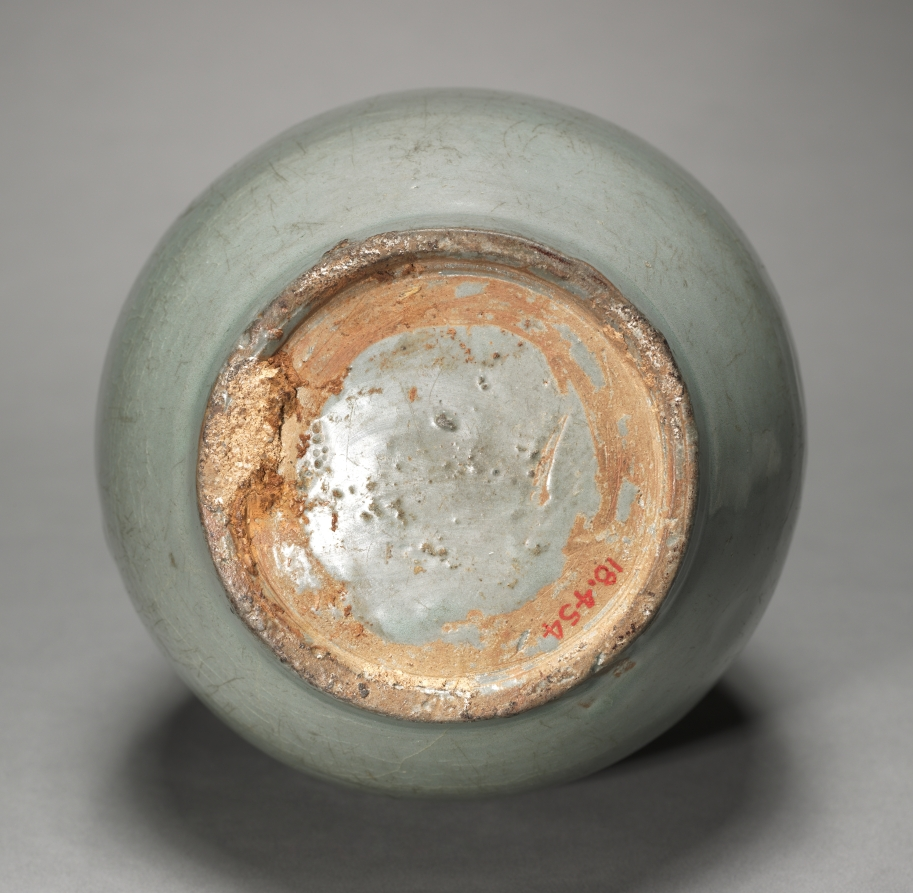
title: Bottle with Chrysanthemum Design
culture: Korea, Goryeo dynasty (918–1392)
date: 1200s-1300s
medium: Celadon ware with inlaid white and black slip decoration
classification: Ceramic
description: This rare long-neck celadon wine bottle is inlaid with white wild chrysanthemums, symbols of both the poem "Drinking Wine" and blessings of longevity. One root has three stems with tiny white blossoms. The damaged lip was repaired with gold lacquer. Korean Celadons Repaired with Gold Termed kintsugi (literally meaning “gold joinery”) in Japanese, this method of repair highlights broken parts with glittering gold mixed with lacquer. Initiated in 15th-century Japan, the technique follows a popular aesthetic concept called wabi-sabi, which finds beauty in imperfect things and continued to be practiced throughout the modern period in East Asia. Goryeo celadons were considered extremely rare treasures among modern collectors; thus, the broken condition of these examples is brilliantly highlighted in gold lacquer on the repaired spouts, handle, and lid.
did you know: Termed kintsugi (literally meaning “gold joinery”) in Japanese, this method of repairing broken parts with glittering gold mixed with lacquer was extensively used for ceramic works in the Goryeo period, such as this one.